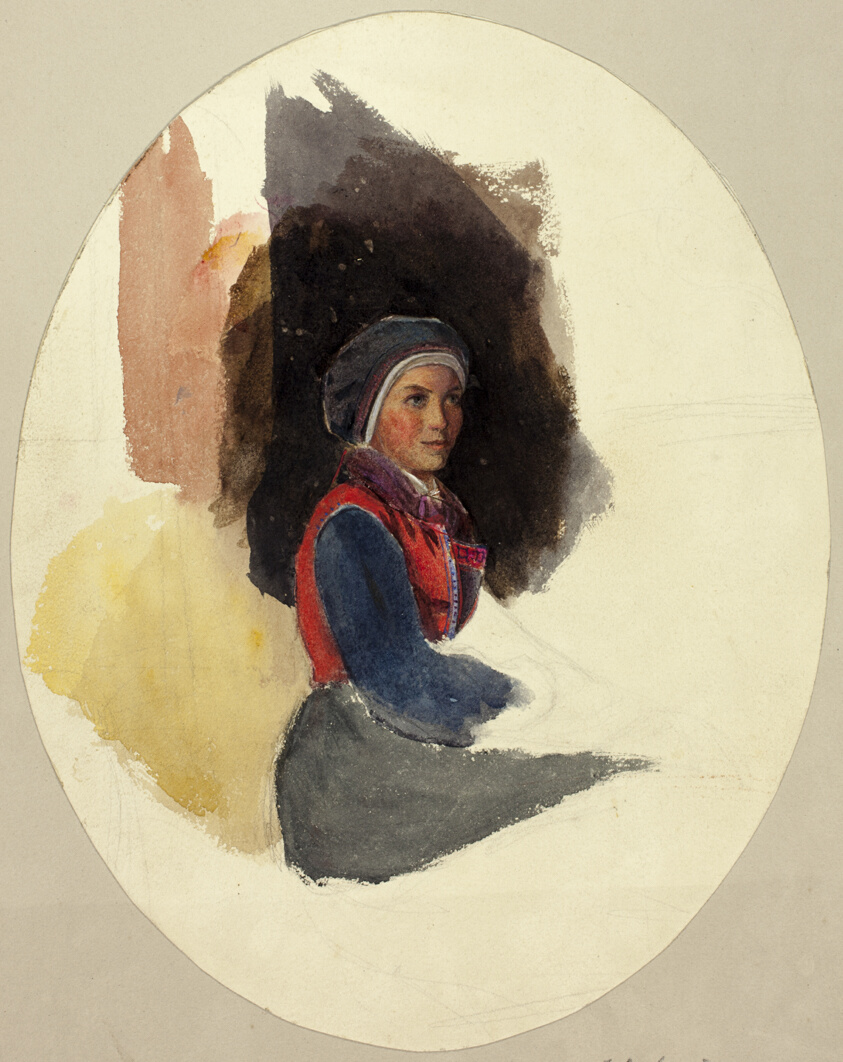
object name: Drawing and Watercolor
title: Sketch of Seated Woman in Peasant Costume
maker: After John Frederick Lewis; English, 1805-1876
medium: Watercolor over graphite, on ivory wove paper, tipped onto gray wove paper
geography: England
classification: watercolor; drawings (visual works); prints and drawing